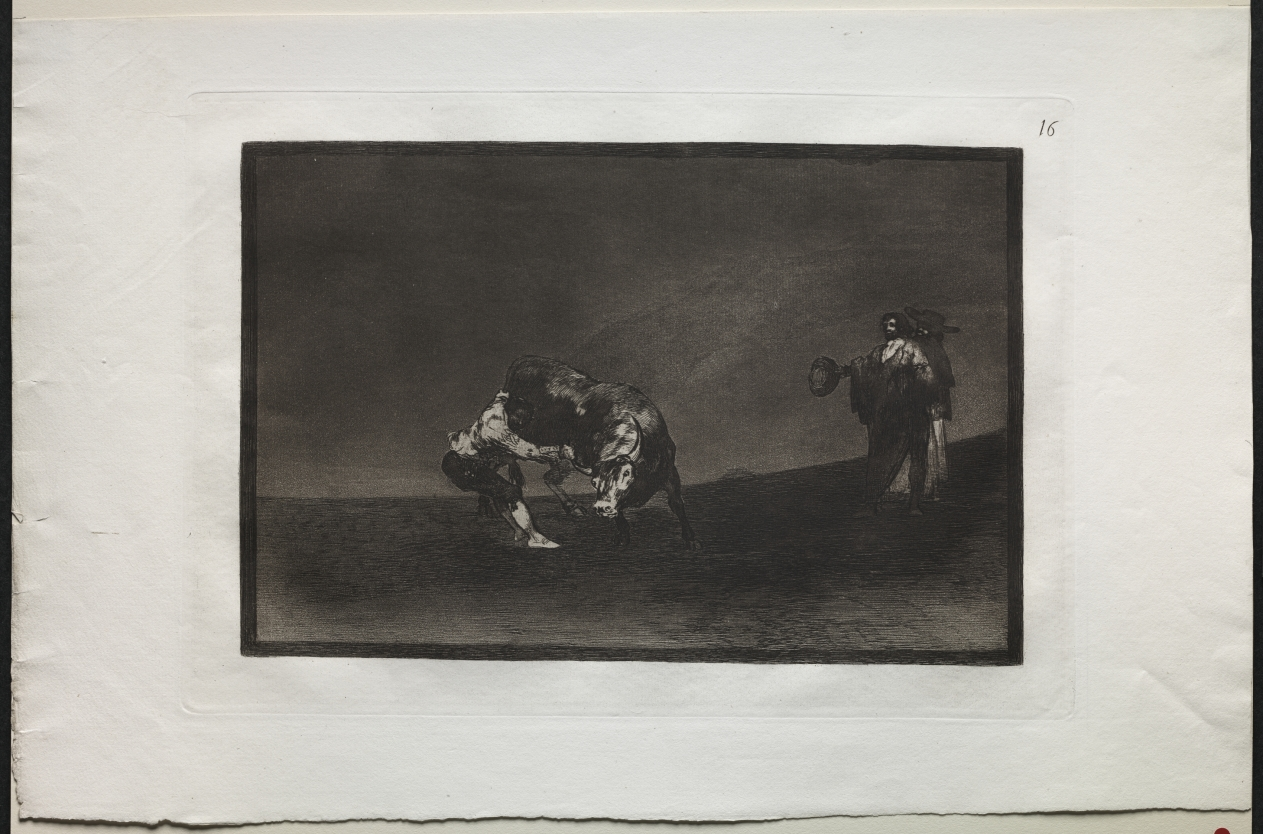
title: Bullfights: The Same Man Throws a Bull in the Ring at Madrid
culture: Spain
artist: Francisco de Goya (Spanish, 1746–1828)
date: 1816, printed 1876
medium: engraving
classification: Print